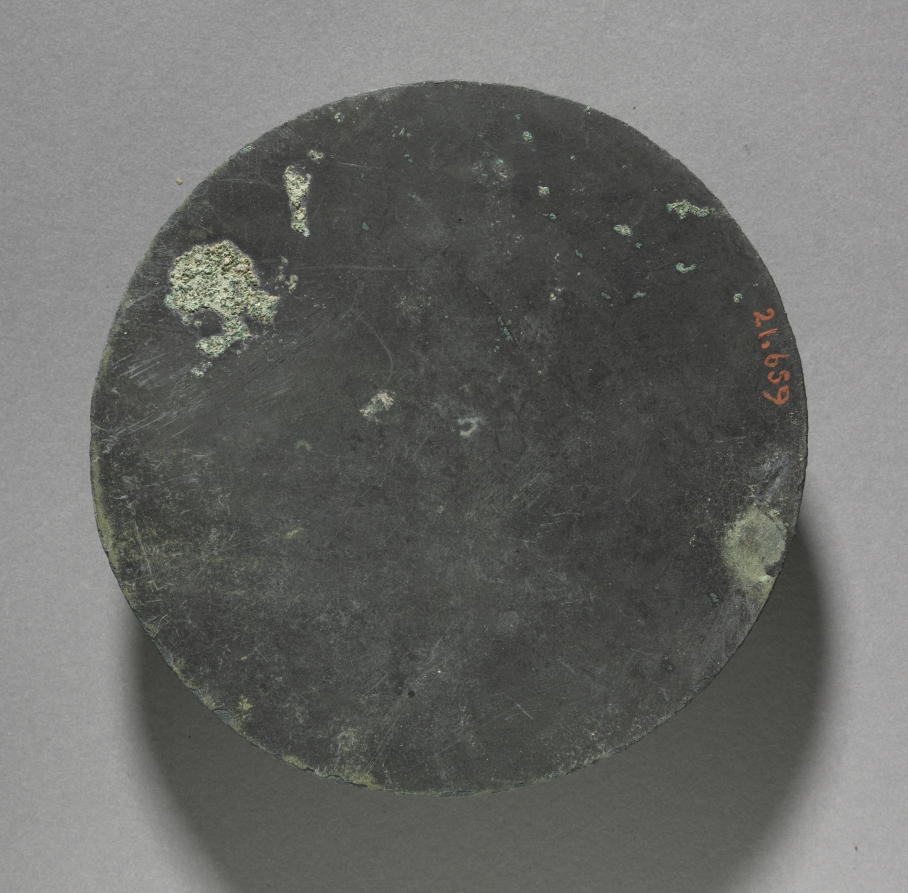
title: Mirror with Scroll Design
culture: Korea, Goryeo dynasty (918–1392)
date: 918–1392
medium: bronze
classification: Metalwork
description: From ancient times, a mirror assumed various roles: a ritualistic tool, a diplomatic gift, and a luxury commodity. During the Goryeo dynasty (918–1392), which saw the great advancement of metallurgy, the royal court was the center of distributing sophisticated bronze artifacts. According to historical records, on the seventh day of the Lunar New Year, the king bestowed a bronze mirror inscribed with auspicious symbols upon each court official as part of a ceremony to celebrate the Day of Humans. This explains why a large quantity of bronze mirrors were excavated from elite tombs.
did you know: Due to its origin as an important tool in religion and politics, mirrors are often mentioned in many Korean proverbs that warn certain behaviors.